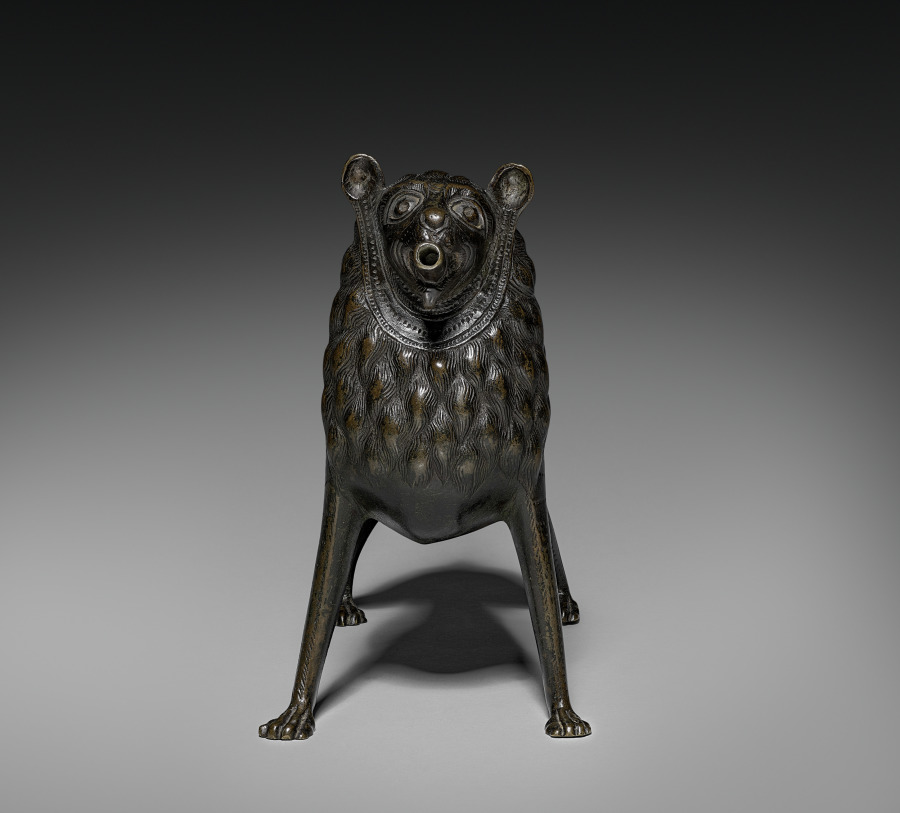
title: Lion Aquamanile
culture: Germany, Lower Saxony, Hildesheim, Gothic period, first half 13th century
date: 1200–1250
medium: bronze: cast, chased, and punched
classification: Sculpture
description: An aquamanile is a water vessel used for washing hands both at church altars and at the dinner tables of upper-class patrons. They often took the form of fantastic beasts such as dragons and unicorns or animals such as horses, birds, dogs, and lions, like this one.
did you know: The handle of this vessel is in the shape of a dragon with a long curving tail.